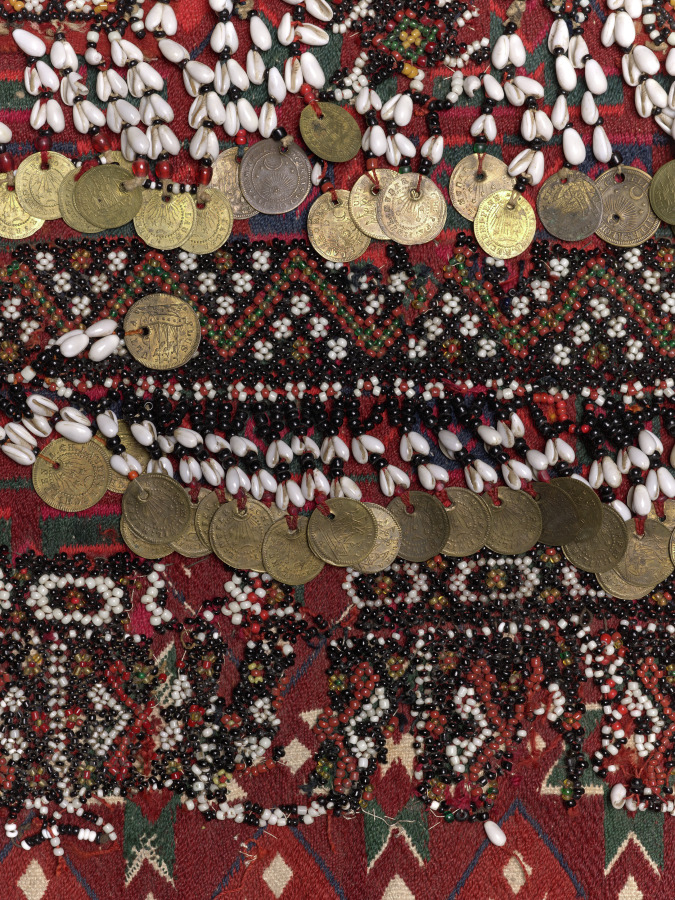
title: Headdress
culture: probably southeastern Europe, Balkans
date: 1800s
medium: Linen, shells, glass beads, metal coins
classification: Garment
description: This long, colorful headdress would hang over the head and down a woman's back. It consists of several panels of linen sewn together, and densely embroidered with silk thread. On the middle panel, small black, red, white, yellow, and red beads are stitched to create geometric designs. Double rows of small cowrie shells outline them, and metal coins with a crescent moon motif also feature in the decoration. These are first punctured, then stitched onto the textile. The lowermost edge is finished with a red fringe.